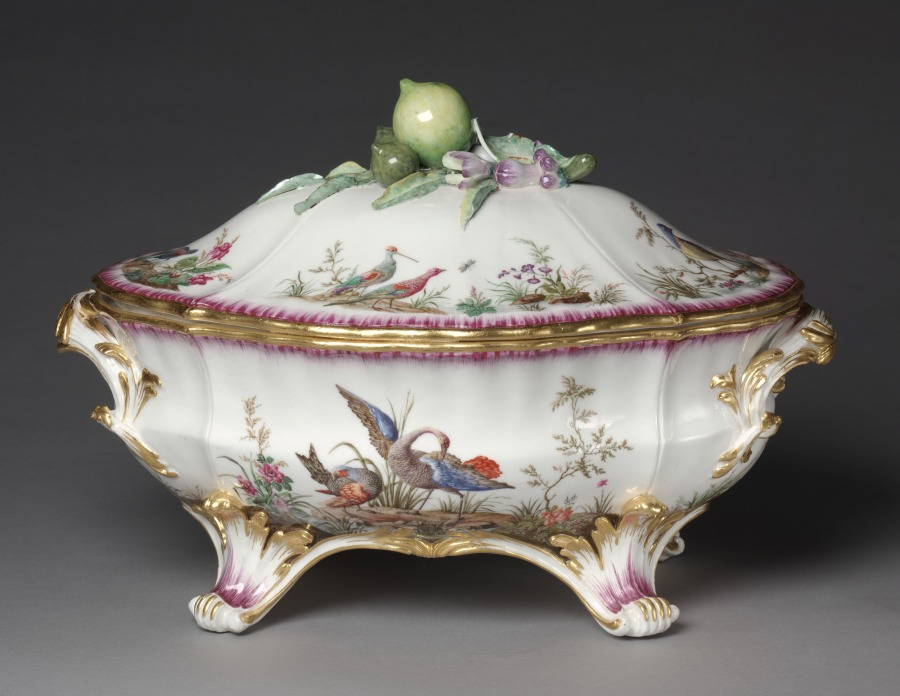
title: Covered Tureen (Terrine ancienne or Terrine ordinaire)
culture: France, Vincennes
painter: attributed to Louis-Denis Armand (French, active c. 1745–1783)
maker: Vincennes Porcelain Factory (France, 1740–56)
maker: probably by Jean-Claude Duplessis le Père (French, 1690–1774)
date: c. 1752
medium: soft-paste porcelain with enamel and gilt decoration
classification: Ceramic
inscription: [Interlaced foliate 'L's surmounted by a fleur-de-lys (indicating royal commision), in blue]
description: The intricately painted birds that decorate this tureen are the work of Louis-Denis Armand. Armand was known for his depictions of birds and landscapes, a specialty that may have come from his work as a painter of lacquered furniture with similar compositions. This tureen was likely designed by master goldsmith Jean-Claude Duplessis who began working as an artistic director at the Vincennes Porcelain Factory in 1748.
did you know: This object was manufactured in soft-paste porcelain, a material used by many European porcelain factories before they were able to emulate the hard-paste porcelain of China and Japan.